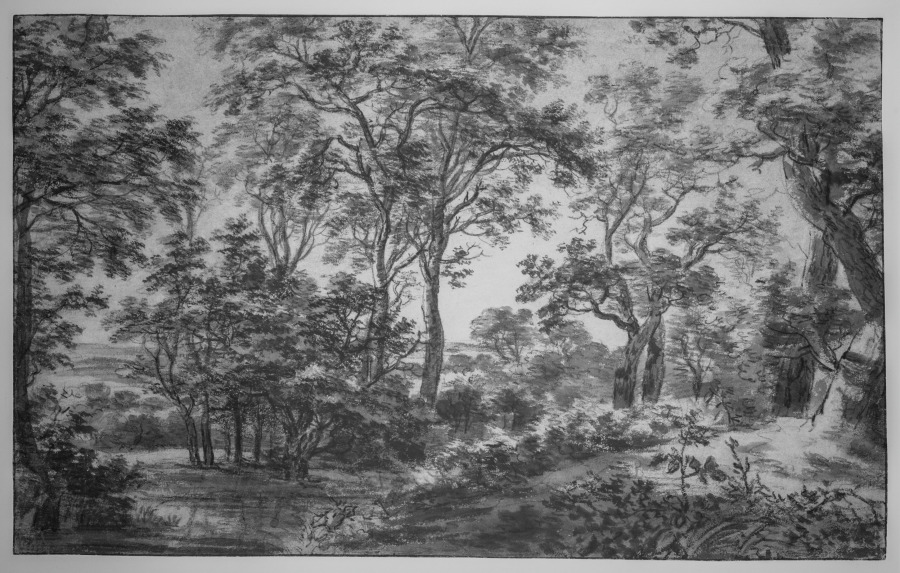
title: Wooded Landscape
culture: Netherlands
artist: Anthonie Waterloo (Dutch, 1609/10–1690)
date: after 1648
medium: Charcoal applied wet, brush and black and brown and white washes; black ink framing line on antique brown laid paper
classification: Drawing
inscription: On verso, pen or graphite inscription (erased?) A. Pynnier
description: Known exclusively for his drawings and prints, the Dutch artist Anthonie Waterloo specialized in tree studies and dense forest scenes such as this drawing. Here he created a vista through groupings of tall trees, producing the effect of shimmering light and movement with his unique technique of using wet charcoal over dry chalk. He added a subtle white wash throughout the center of the composition to create the hint of the sun’s glow beyond the trees. Such a work would have been sold as a finished work of art.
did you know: Studies of dense forests and individual trees were a specialty of Dutch artists in the 1600s.